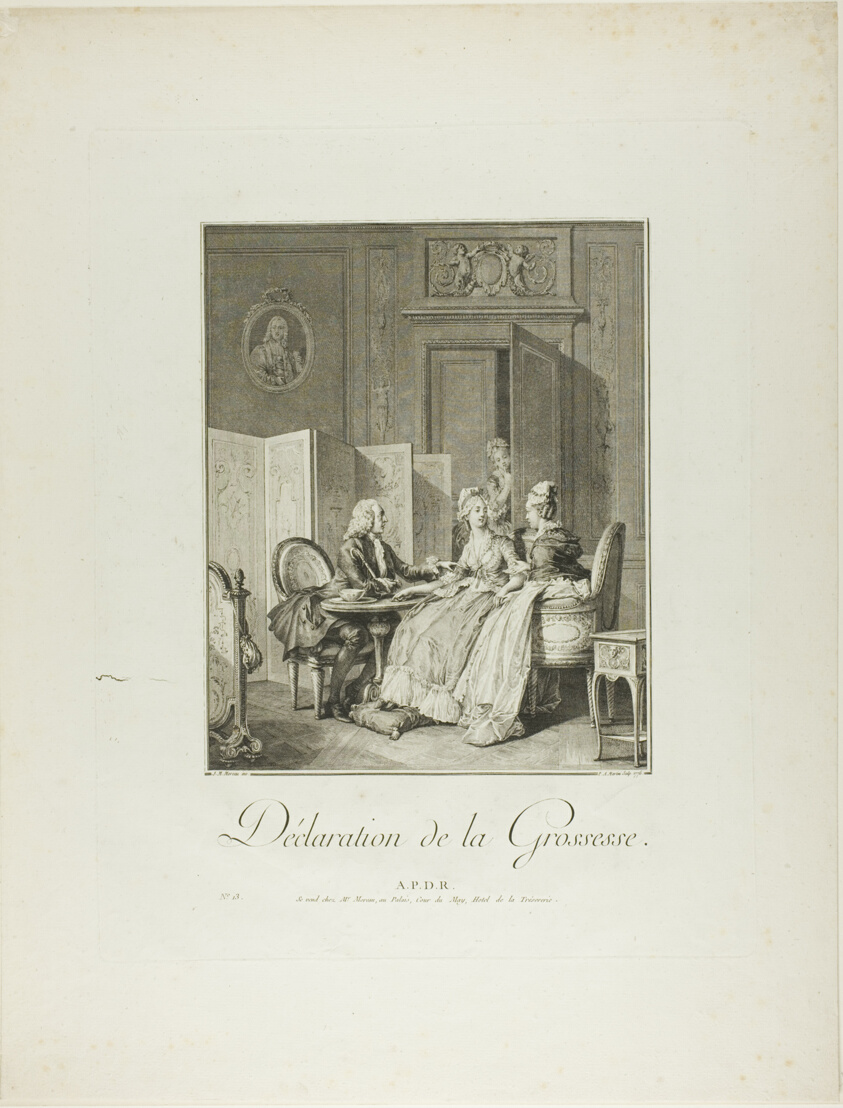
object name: Print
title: Announcement of Pregnancy, from Monument du Costume Physique et Moral de la fin du Dix-huitième siècle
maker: Pietro Antonio Martini (Italian, 1738-1797); after Jean Michel Moreau (French, 1741-1814); published by Laurent-François Prault (French 1712-1780)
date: 1776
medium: Engraving on ivory laid paper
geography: Italy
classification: etching; print; prints and drawing